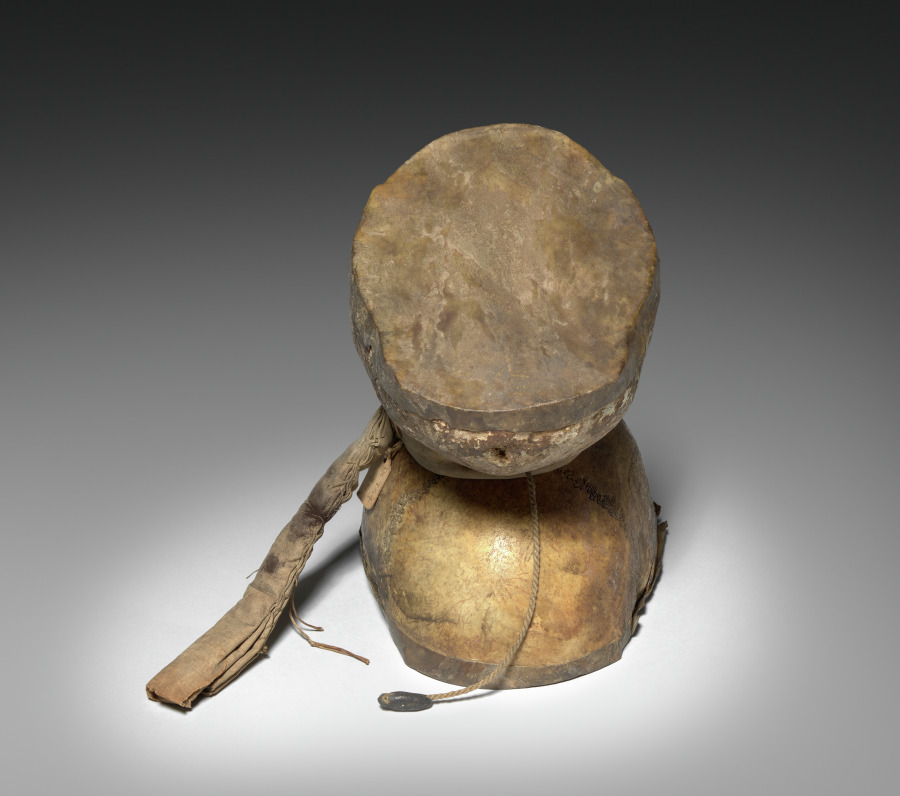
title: Ritual Drum (damaru)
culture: Tibet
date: c. 1800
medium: skull bone, cloth, hemp fiber, leather, and skin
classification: Musical Instrument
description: Damaru drums are made from the tops of two skulls joined in the center and sounded by rapidly turning it side to side so the ends of the cords fly up to sound against the stretched skin. In Hindu and Buddhist rituals, the rhythm of the damaru references the ongoing, relentless beat of time. The material of bone reminds practitioners of the inevitability of death in the course of time.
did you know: Dancing Shiva, in his form as Nataraja, holds a damaru in one hand.